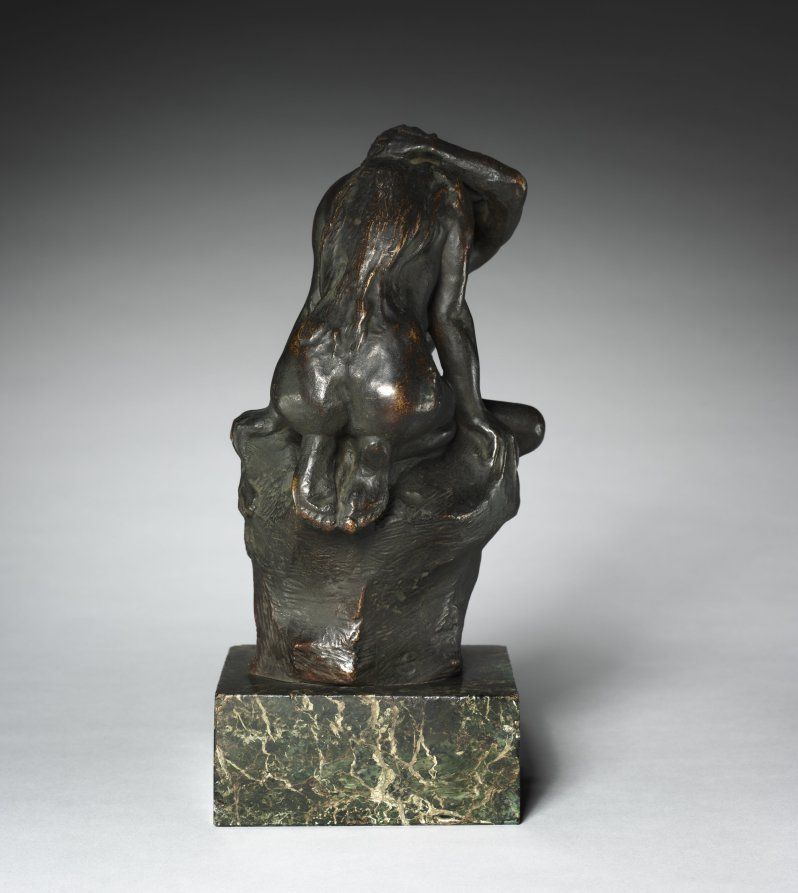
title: Young Girl Confiding Her Secret to Isis (Jeune fille confiant son secret à Isis)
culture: France, 19th century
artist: Auguste Rodin (French, 1840–1917)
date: 1899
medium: bronze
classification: Sculpture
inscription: Inscribed in area below larger figure's left hand and smaller figure's right hand: "Rodin"; below feet of larger figure: "L. Persinka, Fondeur, Versailles"